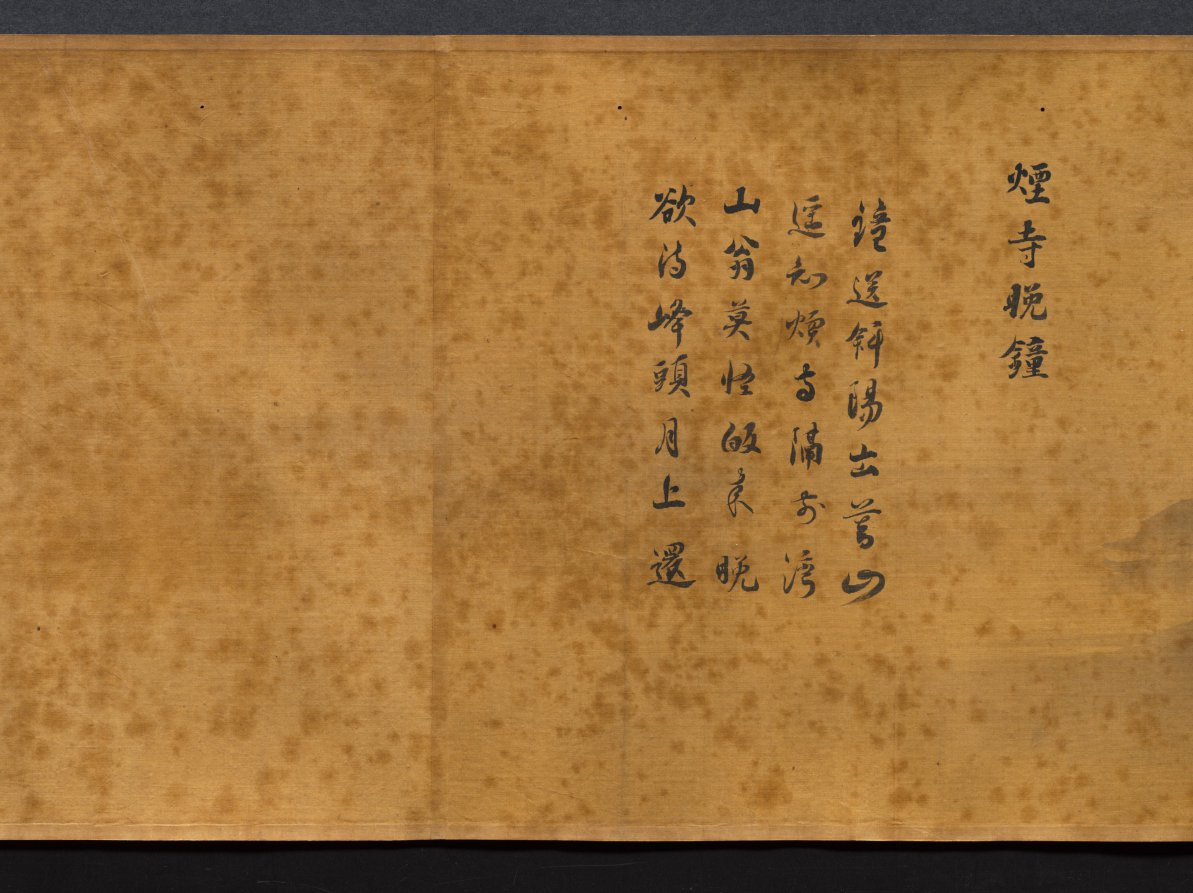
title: Eight Views of Xiao-Xiang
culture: Japan, Edo period (1615–1868)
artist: Kano Tan’yū (Japanese, 1602–1674)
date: 1615–1868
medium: handscroll; ink on silk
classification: Painting